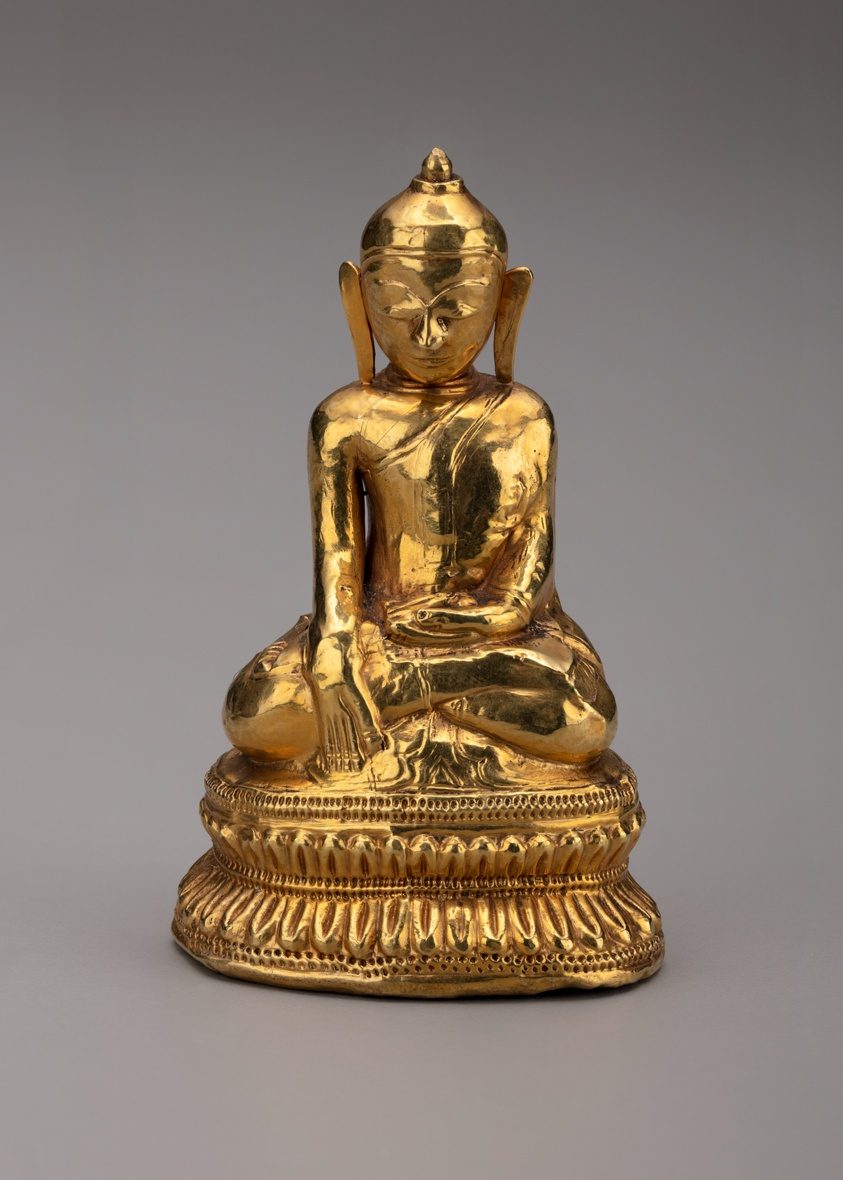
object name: Sculpture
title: Buddha Triumphing over Mara (Maravijaya)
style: Southeast Asian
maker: Thailand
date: 18th/19th century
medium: Gold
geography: Thailand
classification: gold; metal; sculpture; asian art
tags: Buddha